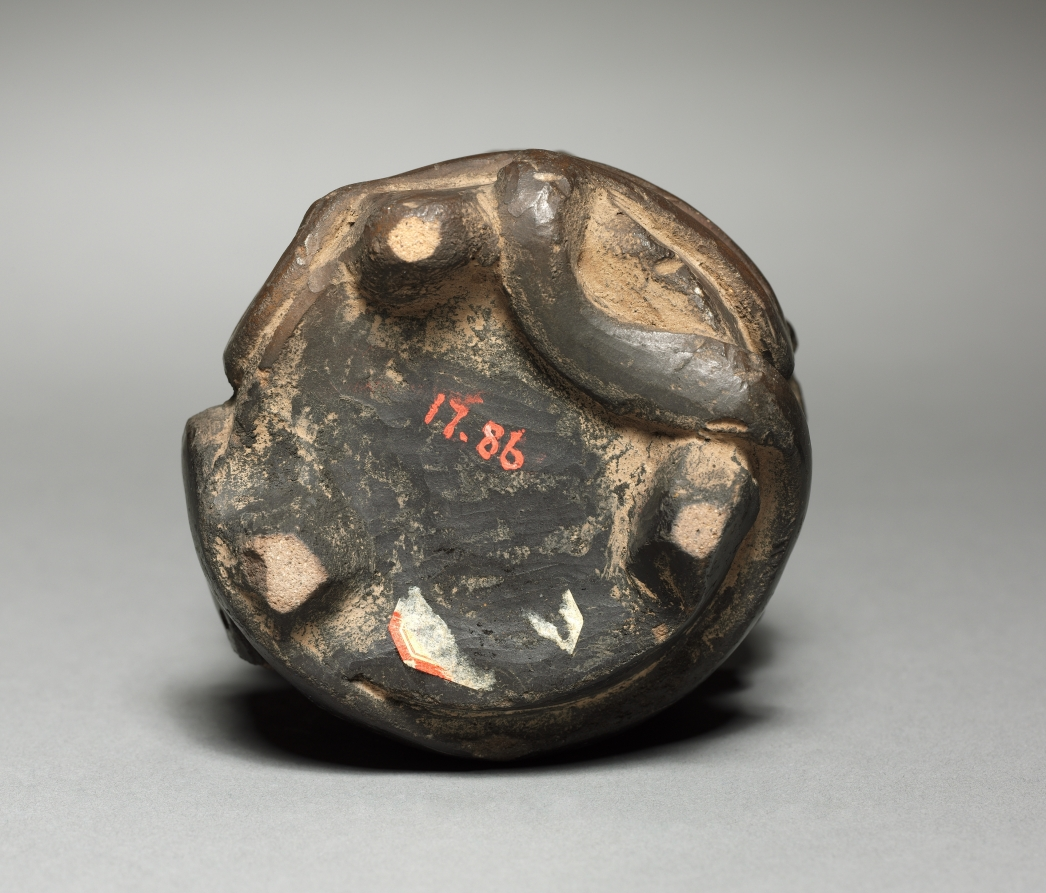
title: Vase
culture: Peru, Tiwanaku style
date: 800–200 BCE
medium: pottery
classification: Ceramic